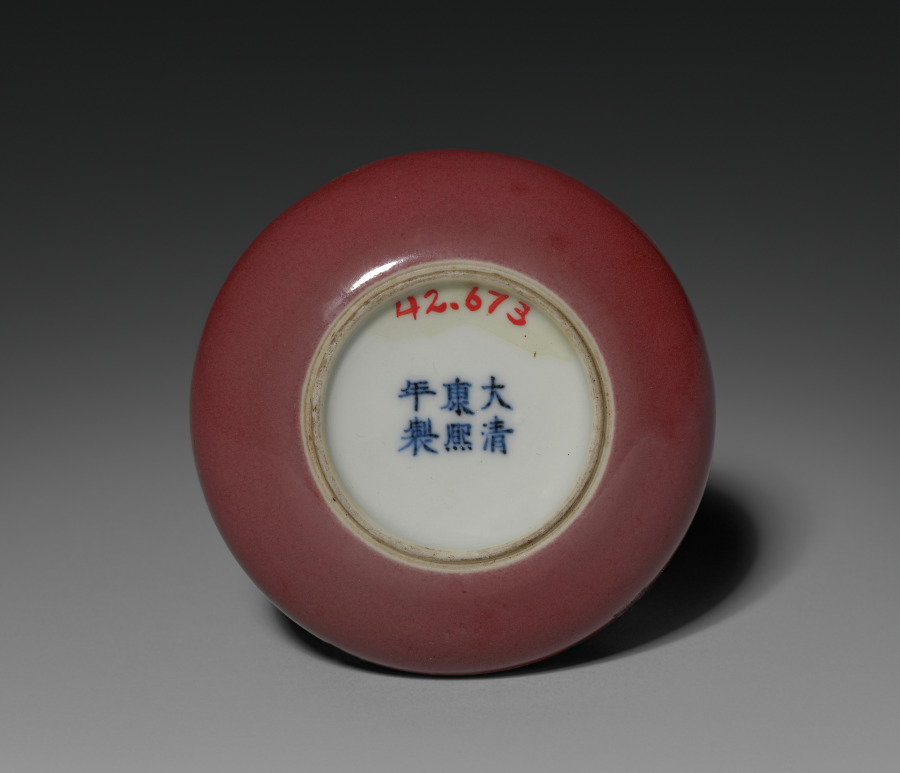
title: Seal Color Box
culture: China, Jiangxi province, Jingdezhen, Qing dynasty (1644-1911), Kangxi period (1662-1722)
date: 1662–1722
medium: porcelain with "peach bloom" glaze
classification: Ceramic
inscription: 大清康熙年制